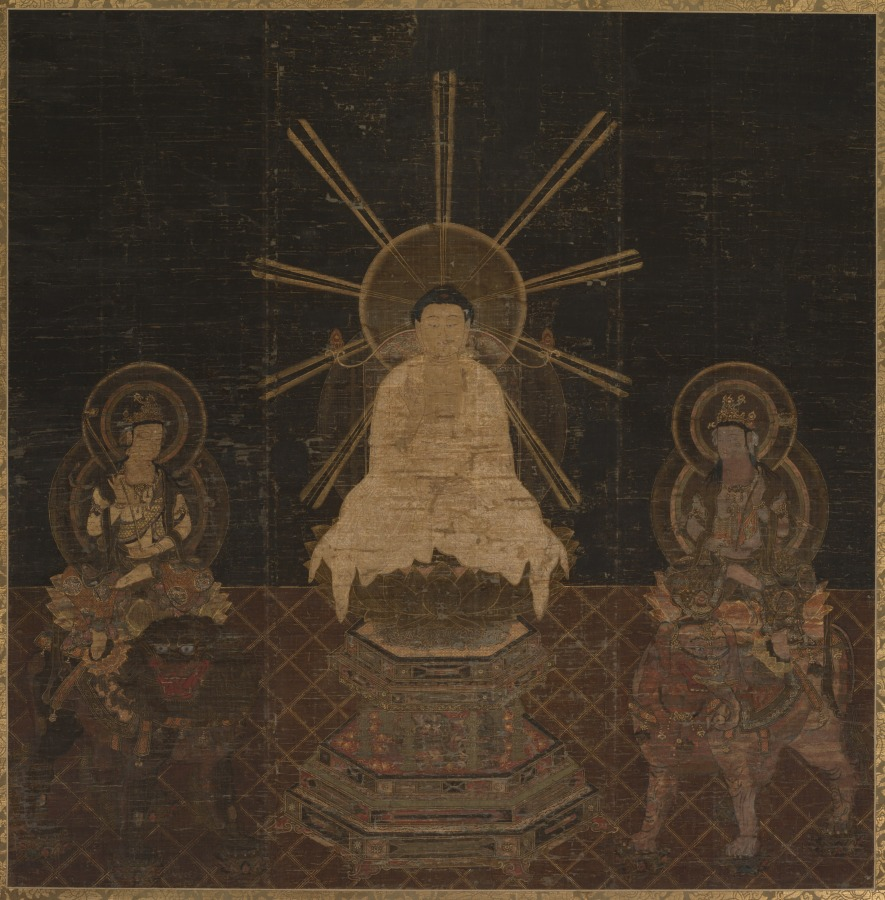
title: Shakyamuni Triad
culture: Japan, Kamakura period (1185–1333)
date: c. 1200–1333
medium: hanging scroll; ink, color, gold and cut-gold on silk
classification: Painting